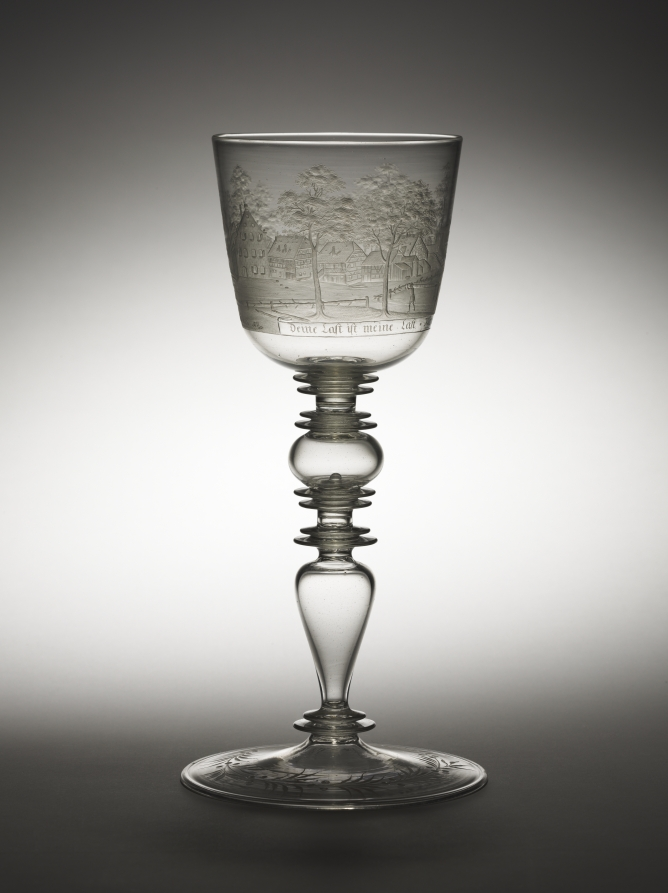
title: Goblet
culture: Bohemia, 17th century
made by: Hermann Schwinger (German, 1640–1683)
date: c. 1680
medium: glass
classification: Glass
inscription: signed and dated. Two inscriptions, one appears on the log held by two men: Es Ruhet auf beiden (It rests on both); the other appears below the scene: Deine Last ist meine Last. Ruhert du so habe ich Rast (Your burden is my burden. It you rest then so have I rest).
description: View of the Panierplatz in Nuremberg, and Allegory.